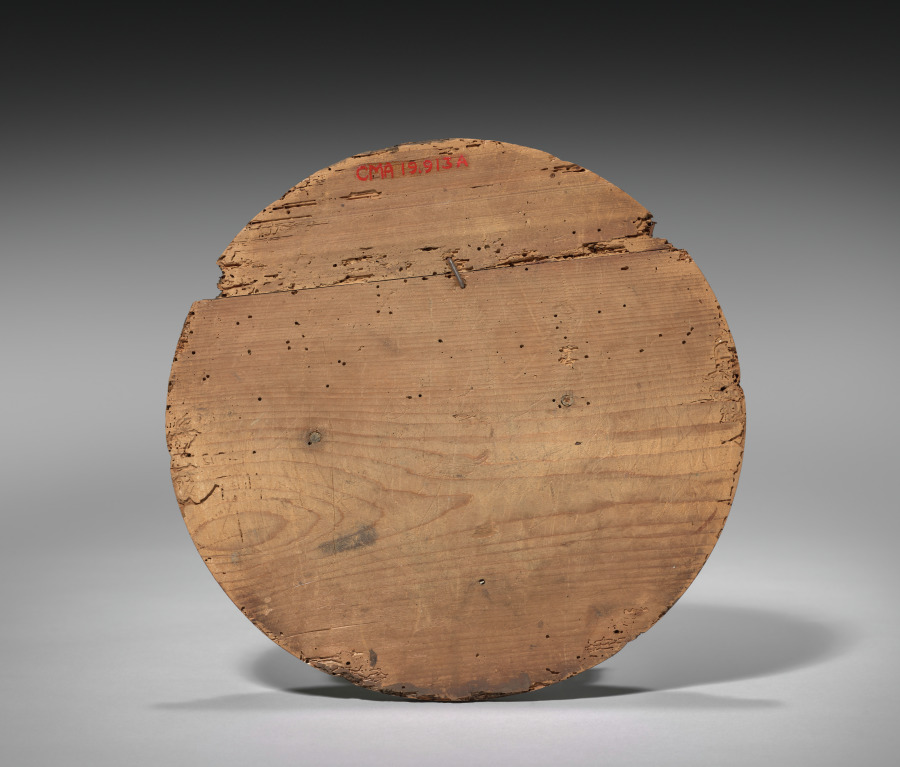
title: Kannon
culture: Japan, Kamakura period (1185–1333)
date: early 1200s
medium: wood with lacquer and gold leaf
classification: Sculpture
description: Kannon, the bodhisattva of compassion, is one of the two bodhisattvas attending Amida, the Buddha of the Western Paradise. The sculpture stands on a lotus pedestal, holding a lotus dais on which the soul of the faithful is received into paradise. The use of gold was prevalent in Buddhist art during this time—it was believed that the yellow light permeated the regions of the Amida—and Amida worship prevailed throughout Japan.